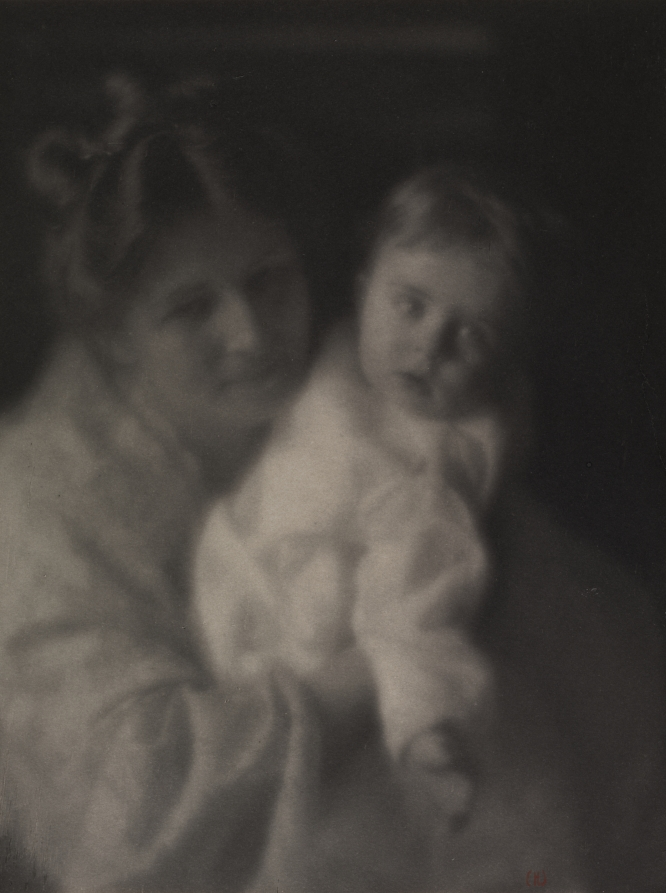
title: Julia McCune Flory and Phoebe Flory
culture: America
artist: Clarence H. White (American, 1871–1925)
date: 1915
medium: platinum print with graphite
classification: Photograph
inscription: Written in red ink on recto of photo: "CHW"; in pencil on recto of original mount: "Clarence H. White [signed] '15"; in pencil on verso: "10 [circled]"